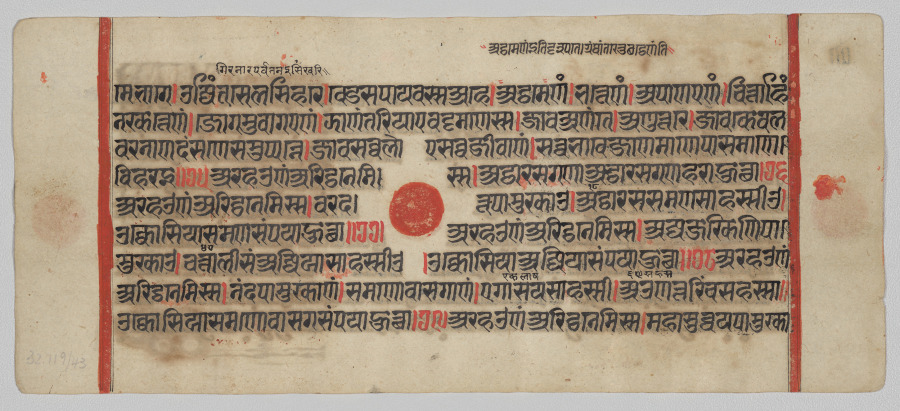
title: Text, Folio 50 (recto), from a Kalpa-sutra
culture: Western India, Gujarat, last quarter of the 15th century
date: c. 1475–1500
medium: Gum tempera, ink, and gold on paper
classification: Painting